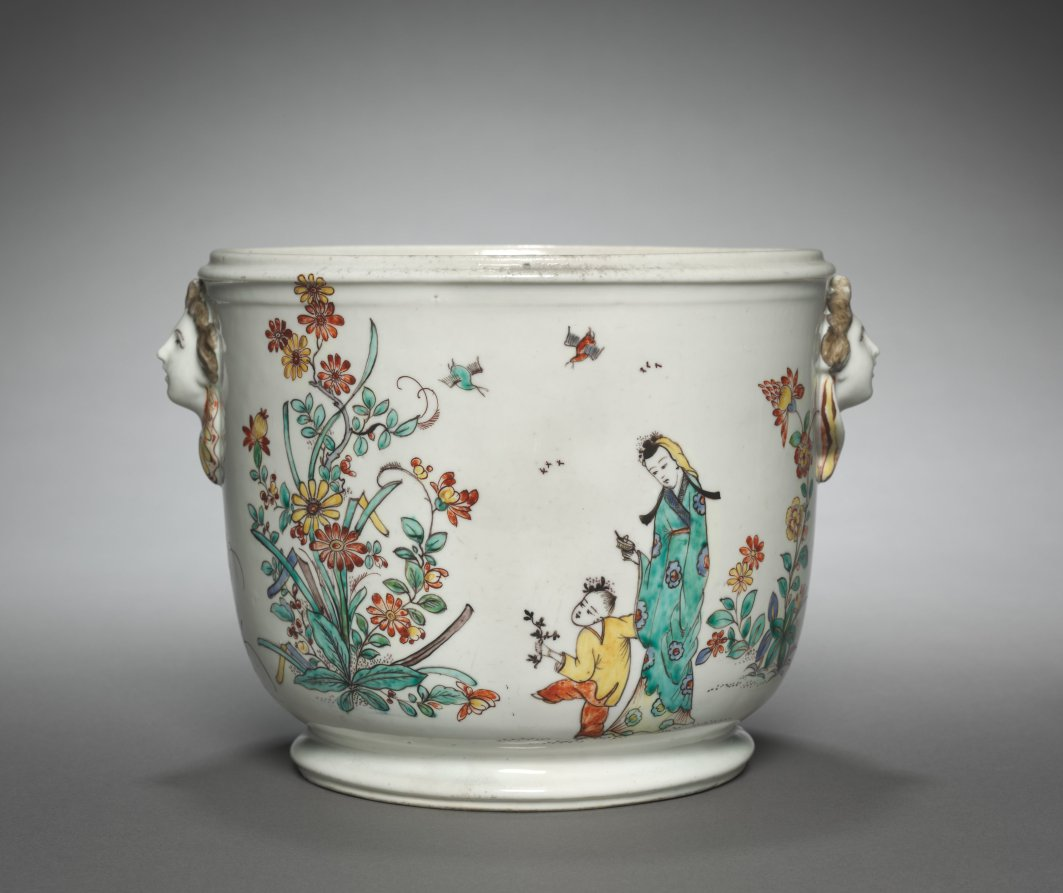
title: Bottle Cooler (seau a bouteille)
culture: France, Mennecy, 18th century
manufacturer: Mennecy- Villeroy Factory (French)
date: c. 1755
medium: Tin-glazed soft-paste porcelain with enamel decoration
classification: Ceramic